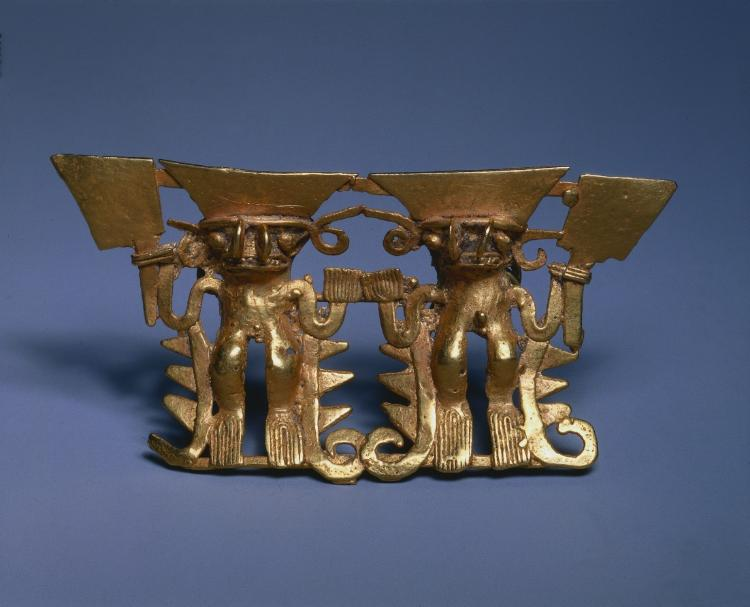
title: Bat-Nosed Figures Pendant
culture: Panama, Azuero Peninsula, Parita style, 11th-16th century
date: 1000–1550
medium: cast gold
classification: Metalwork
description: Both pendants depict paired figures with tusklike noses. The "tusks" perhaps refer to the upswept nose of the leaf-nosed bat, an agile hunter whose "leaf" helps it to snatch prey from midair. The bat's success as a hunter is part of the reason that some identify such paired figures as warriors. They each hold a paddle-shaped object; the larger pair, in elaborate costumes, also clutches staffs.